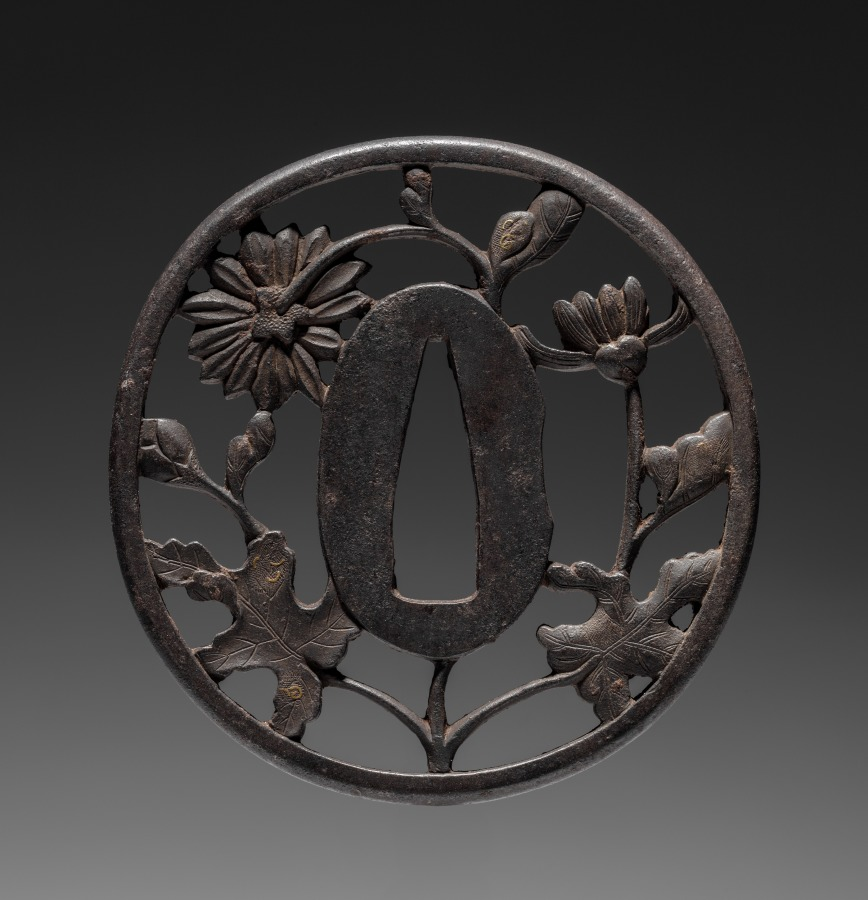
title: Sword Guard (Tsuba) with Chrysanthemum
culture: Japan, Edo period (1615–1868)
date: late 1700s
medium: iron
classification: Arms and Armor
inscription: signed: 武州友忠